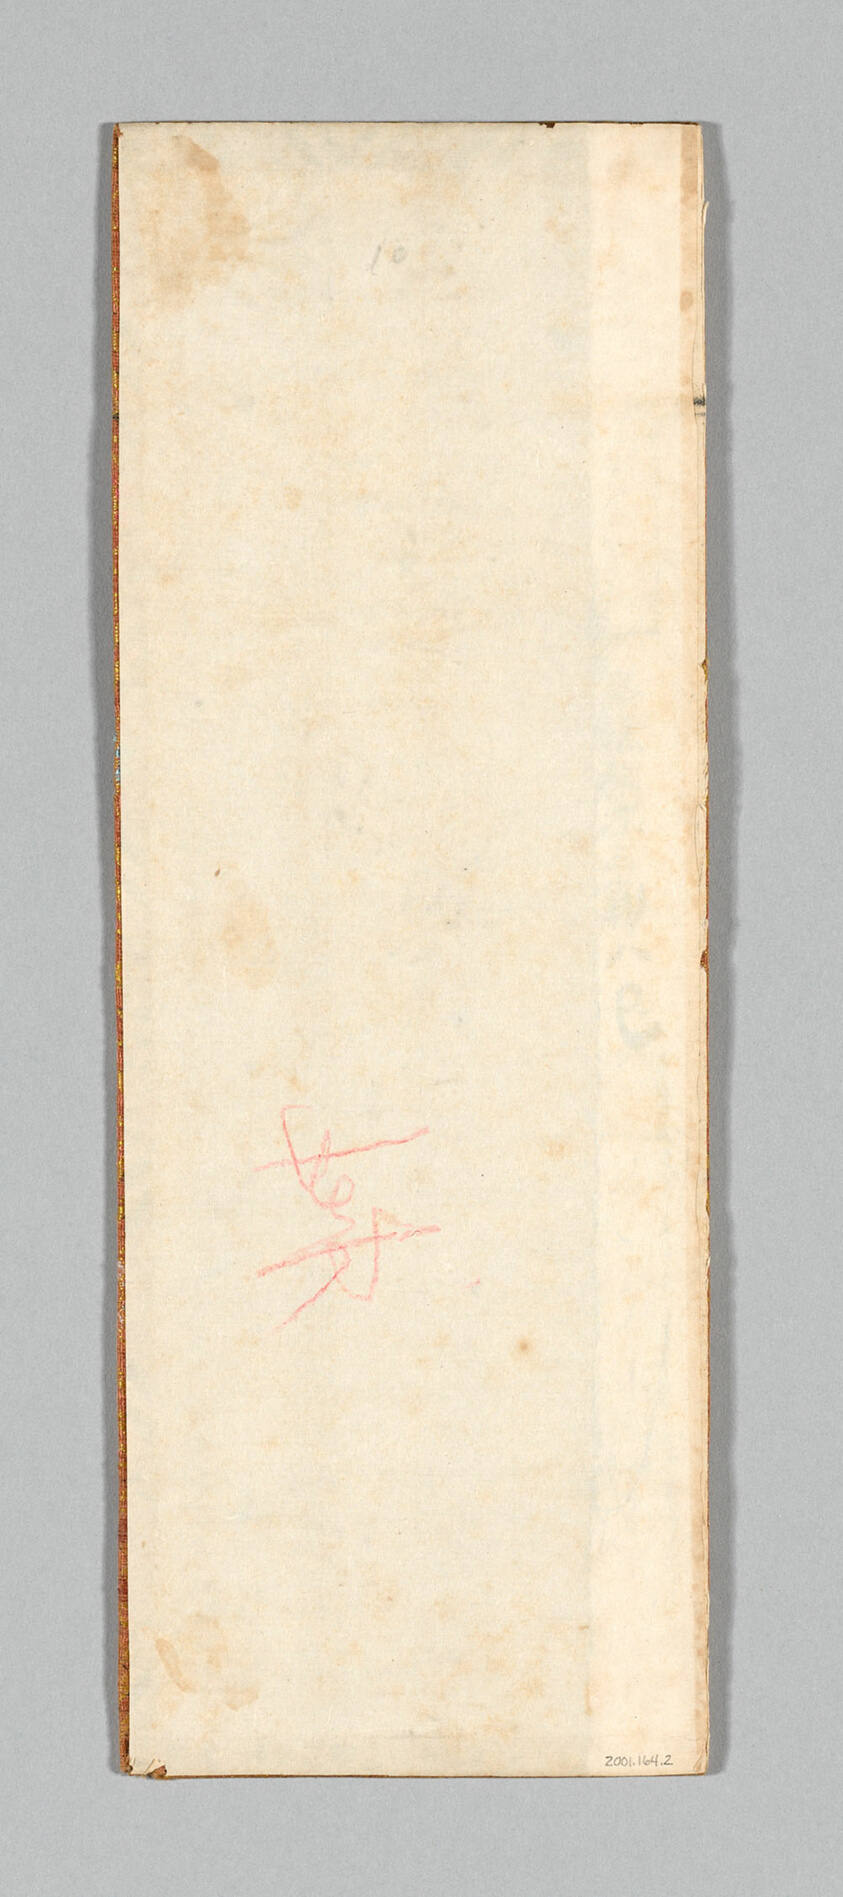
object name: Textile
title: Sutra Cover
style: ming, Chinese (culture or style), East Asian, asian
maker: China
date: Ming dynasty (1368–1644), c. 1590s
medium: Silk and cotton, broken twill weave with patterning wefts; wrapped over cardboard and backed with paper; applied label of silk, plain weave; with inscribed title painted and/or printed with ink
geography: China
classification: textile; weaving